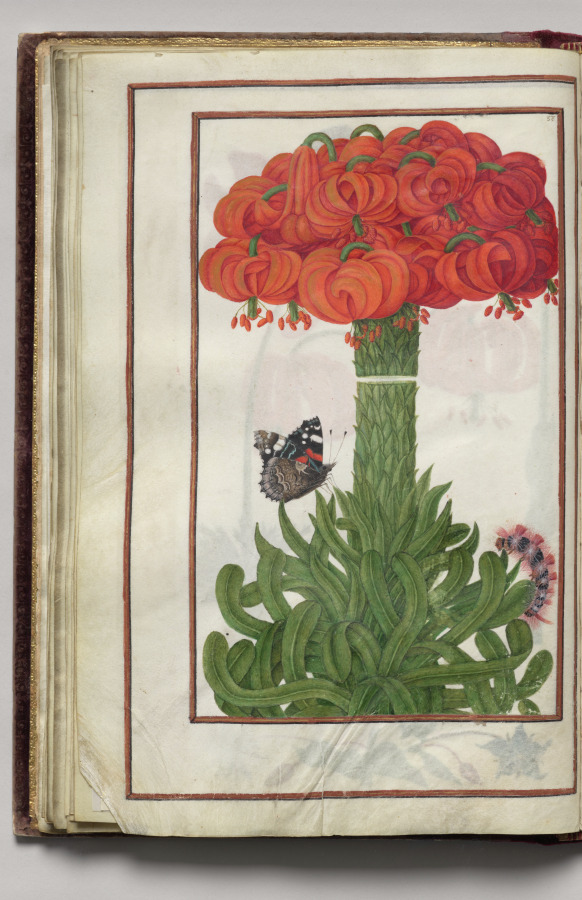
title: Bouquet of Orange Lilies, Moth, and Caterpillar, folio 19 (verso), from Florilegium (A Book of Flower Studies)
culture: France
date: 1608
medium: watercolor, ink, silver, and gold over occasional traces of pencil, on vellum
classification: Bound Volume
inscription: Dated: Poitiers 1608 (on frontispiece) Signed: On frontispiece in black ink, lower right: Van Kuyk Notation on drawing: Frontispiece: in pencil, lower margin: * élève de Van Kessel, peintre flammand (* in pencil also appears in front of Van Kuyk's name).